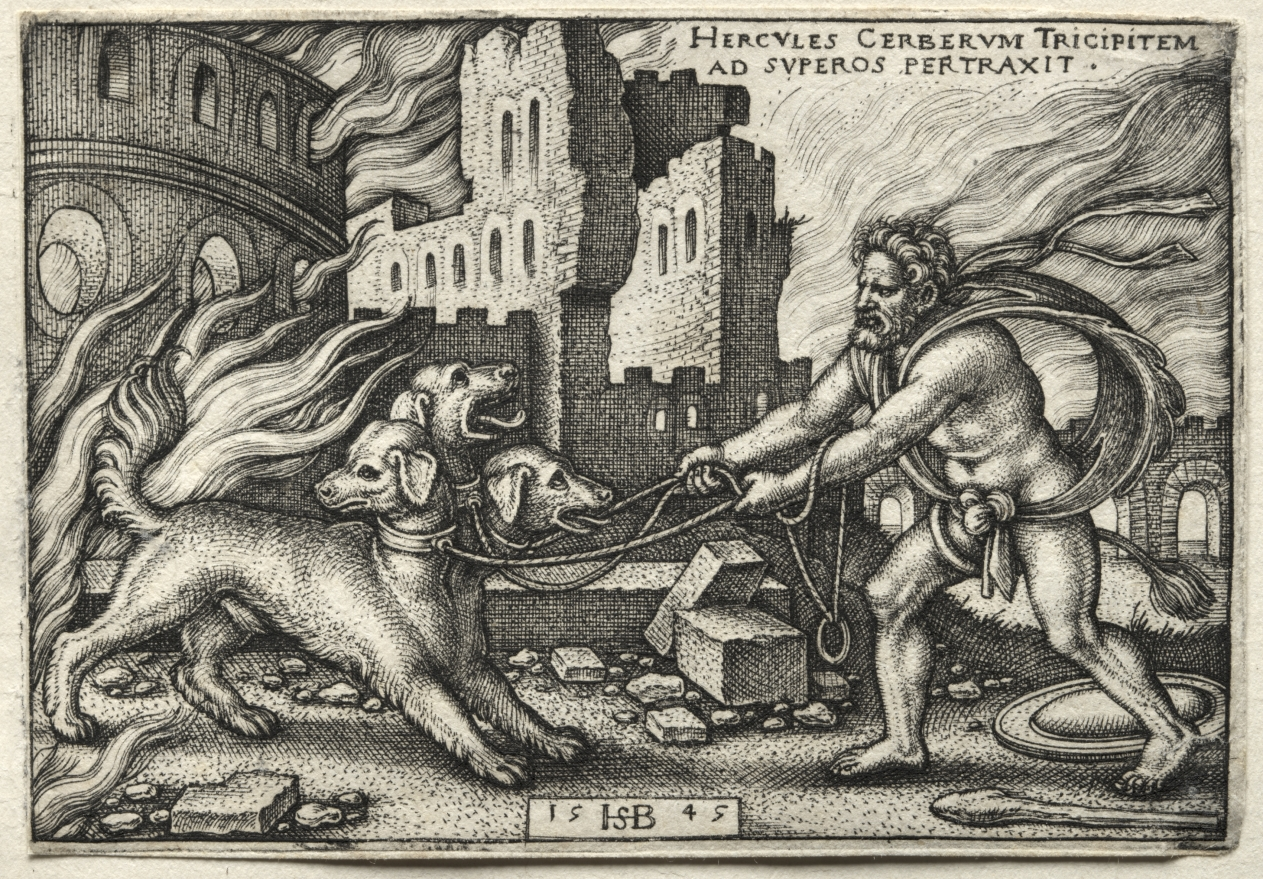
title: The Labors of Hercules: Hercules Dragging Cerberus from the Underworld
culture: Germany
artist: Hans Sebald Beham (German, 1500–1550)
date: 1545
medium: engraving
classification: Print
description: Hercules descended into Hades, the underworld, to bring back Cerberus, the three-headed dog who guards the entrance. Pluto, god of the underworld, agreed to let Hercules take Cerberus as long as he used no weapons. In this version of the scene, Hercules has abanded his club and shield in favor of three leashes to drag Cerberus from the inferno. Beham was one of several German printmakers referred to today as the “Little Masters.” They established their artistic prowess by engraving remarkably small prints, appealing to collectors fascinated with miniature objects and curiosities.